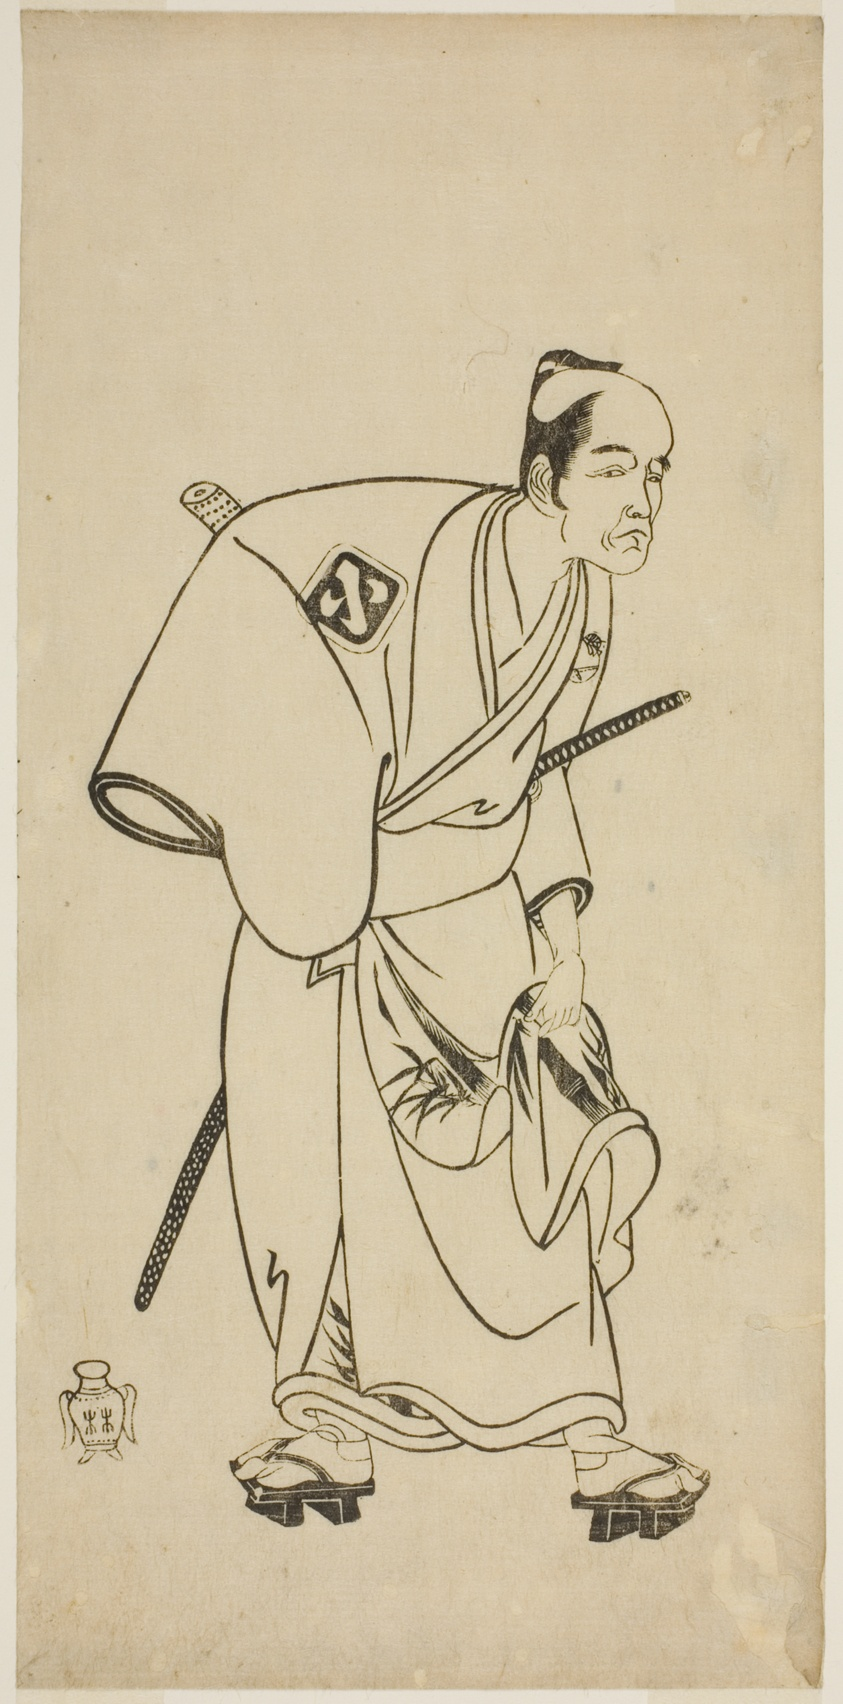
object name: Print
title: The Actor Arashi Otohachi I as Hotei Ichiemon in the Play Ayatsuri Kabuki Ogi, Performed at the Nakamura Theater in the Seventh Month, 1768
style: Japanese (culture or style)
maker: Katsukawa Shunsho 勝川 春章; Japanese, 1726-1792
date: c. 1768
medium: Color woodblock print; hosoban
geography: Japan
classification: woodblock print; print; asian art